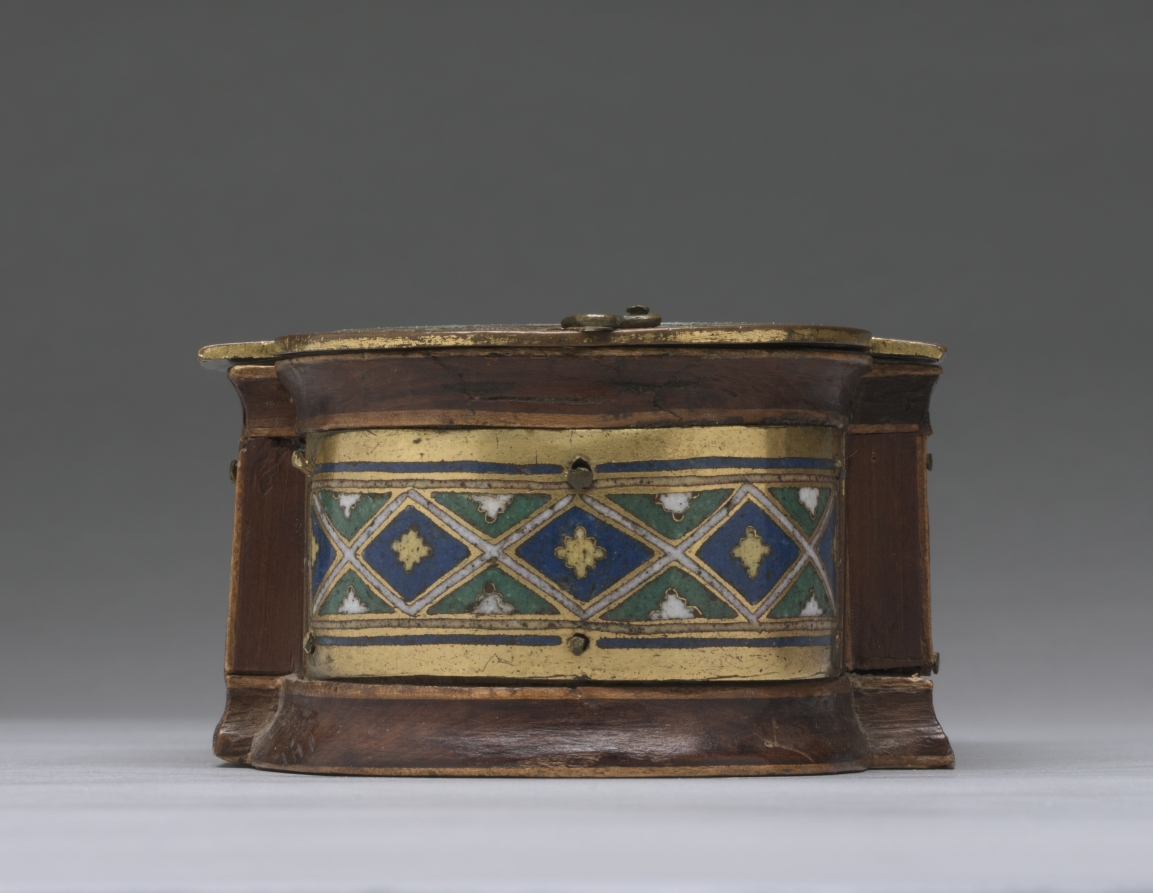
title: Pyx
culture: Germany, Lower Saxony, Hildesheim?, Romanesque period, enamels: 12th century; wood core: 19th century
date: c. 1170–1180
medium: gilded copper, champlevé and cloisonné enamel, wood core (modern)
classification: Enamel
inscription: + H[A]EC DATA P[ER] IVSTV[M] […]AT IN CRVCE VICTIMA CHR[ISTV]M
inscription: + HOC ARIES P(RE)FERT Q[VO]D […] D[EV]S HOSTIA P[ER]FERT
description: The image of Christ’s crucifixion dominates this enameled box. Personifications of the Christian church, the Jewish faith, and the Virgin and Saint John flank the cross. Two Old Testament scenes--Abel’s sacrifice of sheep and Abraham’s sacrifice of Isaac--appear on either side. The box once served as a pyx, a container for the consecrated host, itself a symbol of Christ’s sacrifice.